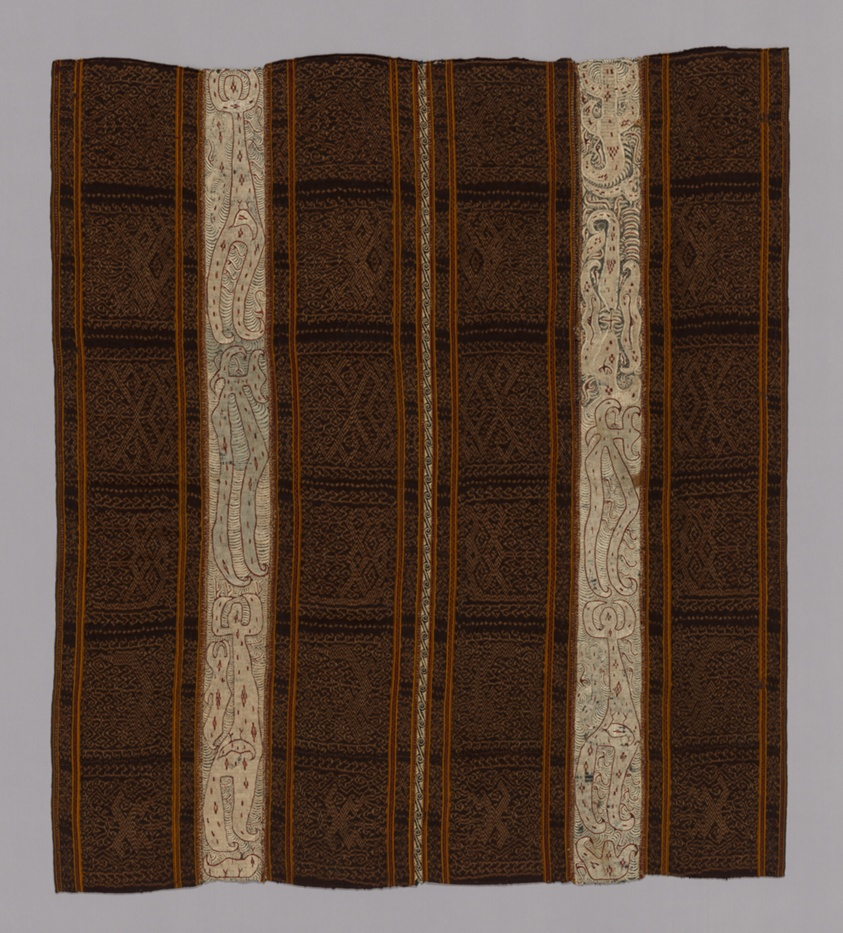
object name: Costume and Accessories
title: Woman's Ceremonial Cloth (Tapis)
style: indonesian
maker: Paminggir (Indonesia, Sumatra, Lampung)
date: 19th century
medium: Five panels joined: three panels of stripes of cotton and silk, plain weave with supplementary brocading wefts and stripes of cotton, warp resist dyed (warp ikat) plain weave with paired warps: and two panels of stripes of cotton plain weave; embroidered with silk and cotton in back, chain, running, split, stem and surface satin stitches and stripes of cotton and silk, plain weave with supplementary brocading wefts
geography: Indonesia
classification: textile; weaving; weaving - printed; costume